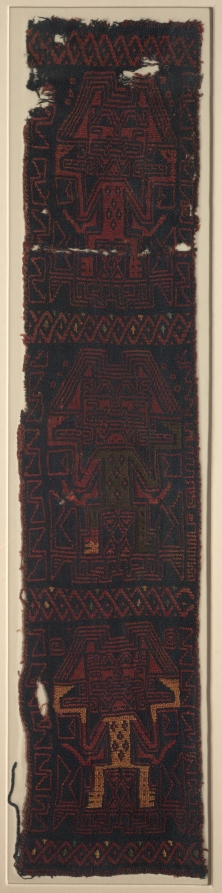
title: Textile Fragment with Three Frontal Deities and Interlace Pattern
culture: Peru, South Coast, Paracas (700 BC -AD 1), Yauca Valley?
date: 700–400 BCE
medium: camelid fiber; double-cloth with structural embroidery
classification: Textile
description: This textile fragment and (2005.14), belong to a group that represents Andean weavers’ earliest known achievements in double cloth, a technique that allows the creation of identical designs on both faces of the cloth but in reversed colors. They also record the devotion to abstraction typical of the Paracas style. One features three repeats of a highly geometrical standing deity with a fanged mouth. The other includes several stylized deity heads and a blocky, frontally posed feline. The type of garment that these fragments come from remains unknown.